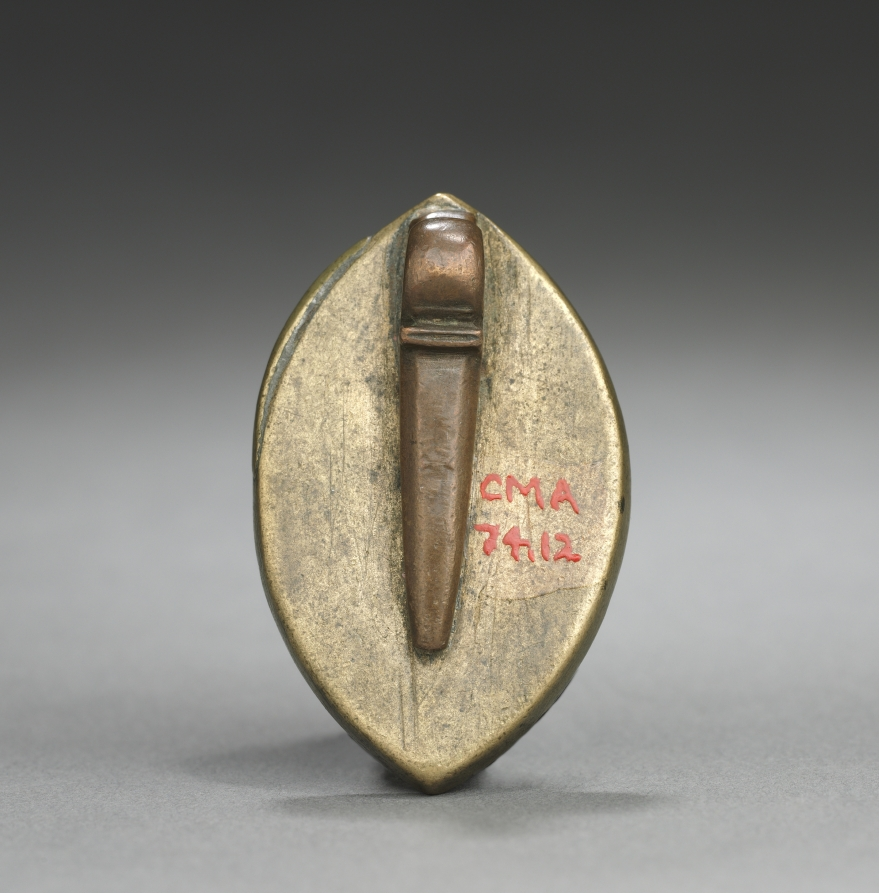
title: Almond-Shaped Seal: Coronation of the Virgin with a Kneeling Monk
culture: England or Germany, Gothic period, 14th century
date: 1300s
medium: gilded bronze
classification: Glyptic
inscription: CELI DIGNA TRONO TE MATER VIRGO CORONA.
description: These seals were once used in monasteries as molds for making wax impressions that were routinely pressed onto letters, charters, and other documents as proof of authenticity.